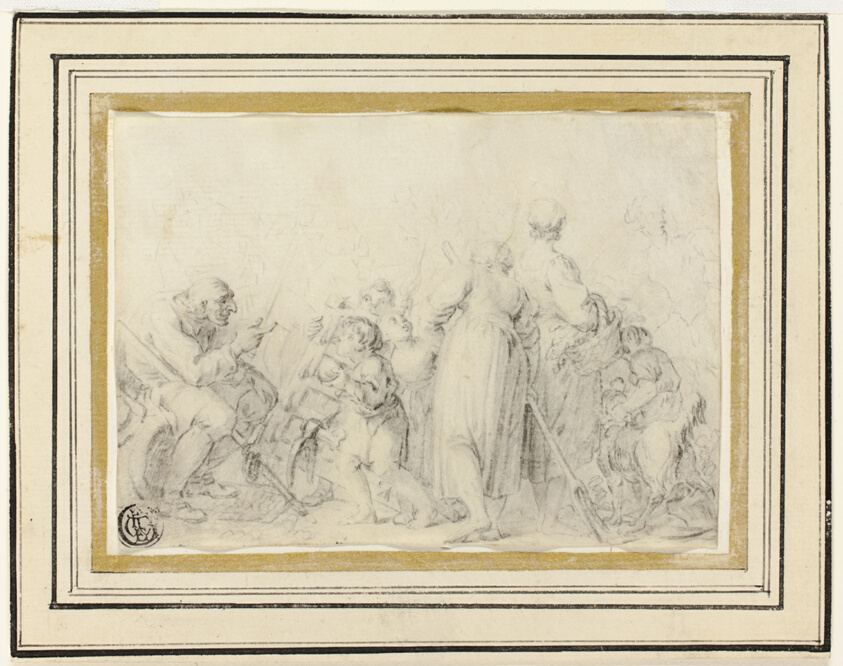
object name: Drawing and Watercolor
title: Genre Scene with Old Man, Peasant Women and Children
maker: Style of Jean-Baptiste Greuze (French, 1725-1805); formerly attributed to Jean-Baptiste Huet (French, 1745-1811)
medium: Graphite on vellum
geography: France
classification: graphite; drawings (visual works); prints and drawing